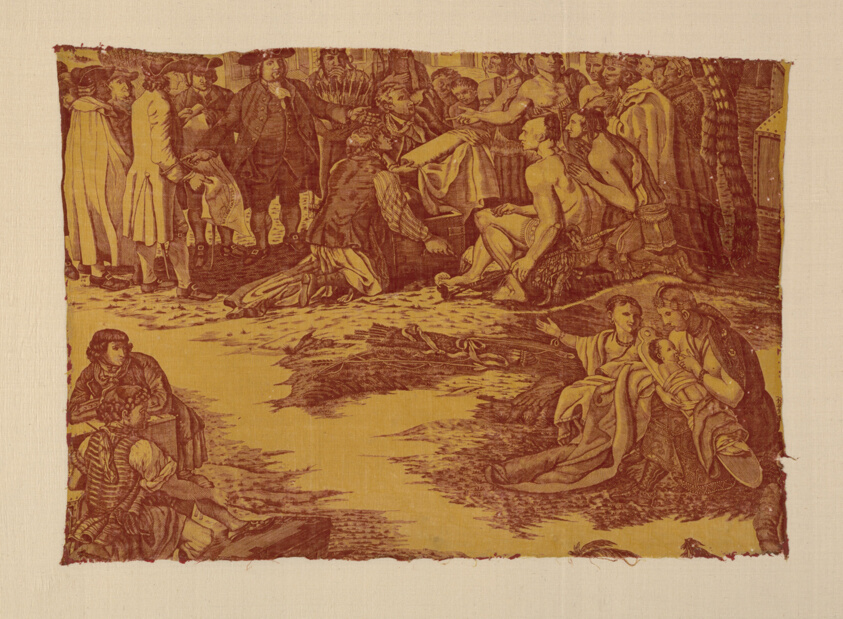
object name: Textile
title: Fragment Entitled "William Penn's Treaty with the Indians"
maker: Adapted from an engraving by John Hall (English, 1739–1797); Published by John Boydell (English, 1719–1804), London, 1775; After a painting by Benjamin West (American, 1738–1826) dating from 1771; England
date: c. 1785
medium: Cotton, plain weave; copperplate and block printed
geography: England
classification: textile; weaving - printed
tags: propaganda